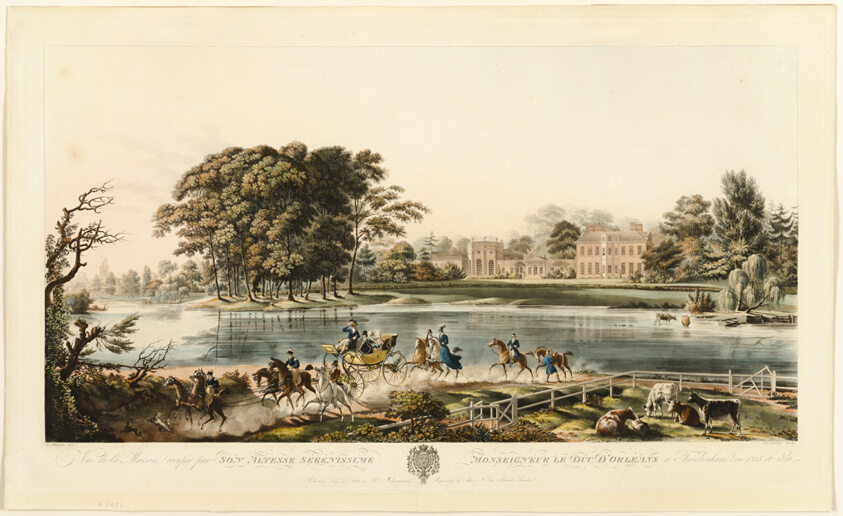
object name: Print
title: Maison du Duc d'Orléans à Twickenham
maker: Joseph Constantine Stadler (English, 1780-1822); after L. Attbalin (French, 18th century)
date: published August 1, 1816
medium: Hand-colored aquatint and etching on cream wove paper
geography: Twickenham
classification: aquatint; print; prints and drawing